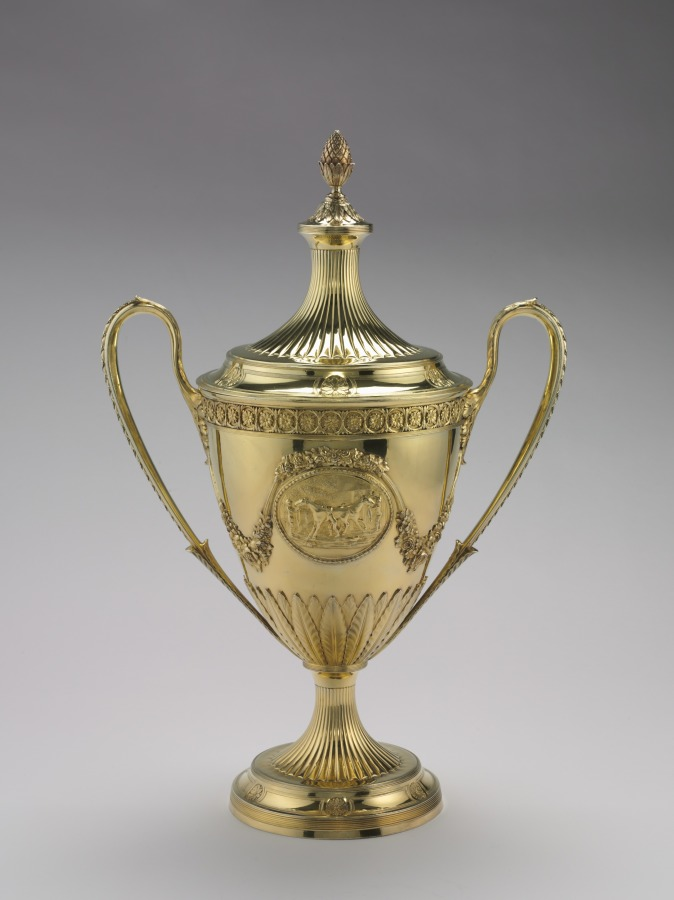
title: Trophy Cup and Cover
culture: England, 18th century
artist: Peter Bateman (British, 1740–1825)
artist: Anne Bateman (British, 1748–1813)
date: 1792–1793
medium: silver gilt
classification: Silver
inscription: Engraved arms: Grosvenor impaling Egerton and Grey (arms of Robert Grosvenor (1767–1845), the first Marquess of Westminster, and Lady Eleanor Egerton (1770–1846))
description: Silver fulfilled a prominent role in projecting wealth, status, power, and ritual in British life during the 1600s and 1700s. Elaborate forms such as this trophy, with its swags of flowers, neoclassical rosettes, acanthus spears, and acorn finial, not only represented wealth in its sheer silver weight but also provided royal and aristocratic owners a surface for displaying engraved coats of arms. Engraved on one side of this trophy cup can be found the arms of Robert Grosvenor (1767–1845), the first Marquess of Westminster, and Lady Eleanor Egerton (1770–1846), whom he married in 1794, a year after the trophy’s completion. The other side depicts preparations for a horserace, the most culturally significant leisure activity enjoyed by aristocratic families in the 1700s. Grosvenor owned a number of famous horses and was likely awarded this trophy following a successful race.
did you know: The graceful form of this trophy by Peter Bateman and his sister-in-law Anne Dowling Bateman is reminiscent of the elegant designs produced by their mother Hester Bateman (1708–1794), one of the most celebrated female silversmiths of all time.